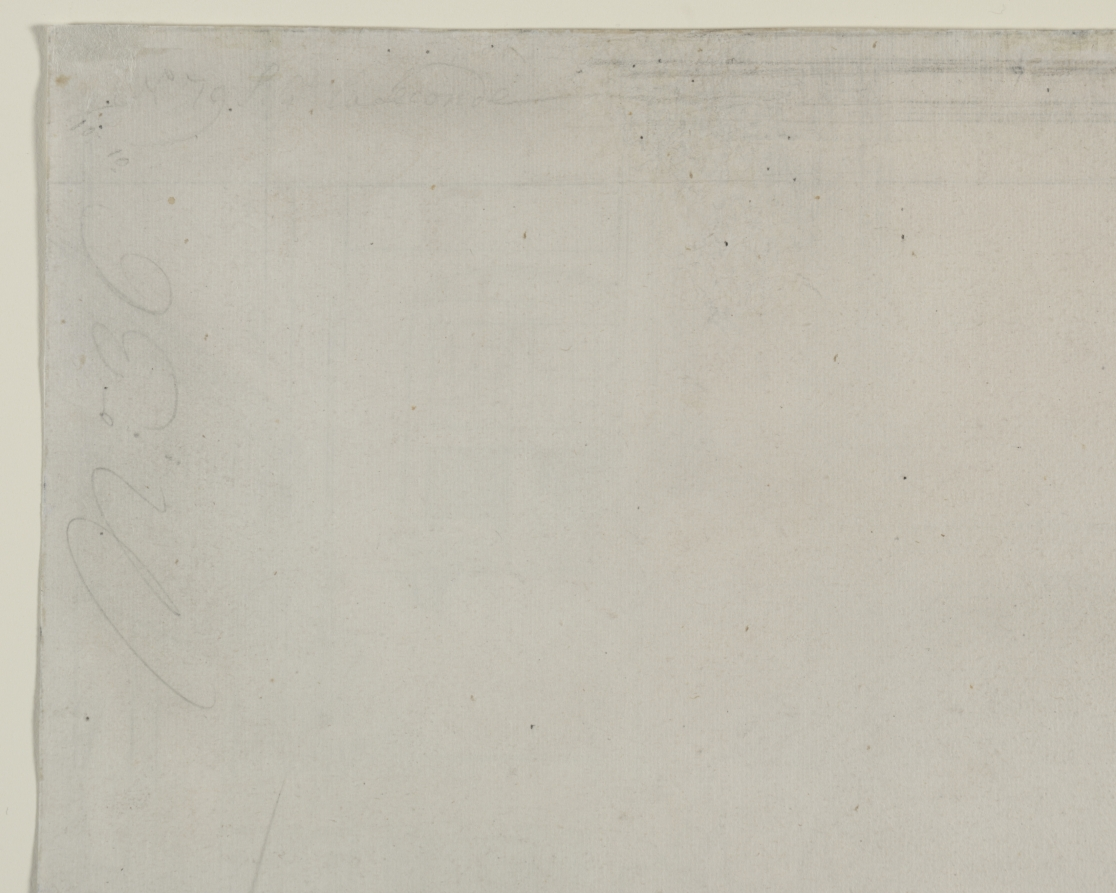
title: Ecce Homo. Christ Presented to the People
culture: Netherlands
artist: Rembrandt van Rijn (Dutch, 1606–1669)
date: 1655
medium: drypoint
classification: Print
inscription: Recto, upper left, in graphite: 79; lower left: FPS. Verso, in purple ink: Prince of Liechtenstein or Colnaghi for Liechtenstein stamp; in black ink, Zinser stamp, castle tower (rook chess piece); along side, in graphite: No. 36; along top: (illegible) name; upper left, in graphite: No 79 P(?) G (?) La Second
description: Rembrandt was an experimental and innovative printmaker and the first to execute works in pure drypoint on this monumental scale. Drypoint produces blurred lines and rich, velvety shadows, but these effects are lost as the plate wears. A limited number of rich impressions exist like this fine example of the fifth state, which demonstrates how Rembrandt redefined the expressive potential of printmaking. Rembrandt’s habit of drawing from life made him a keen observer of behavior and body language, endowing his biblical scenes with a human dimension and veracity not seen previously. The throng in Christ Presented to the People represents a cross section of the population and reflects the pictorial tradition that common humanity condemned Christ. Large areas of the imposing building, symbolizing the crushing weight and authority of the state, remain unworked so that blank white paper seems radiant in contrast to rich black shadows.